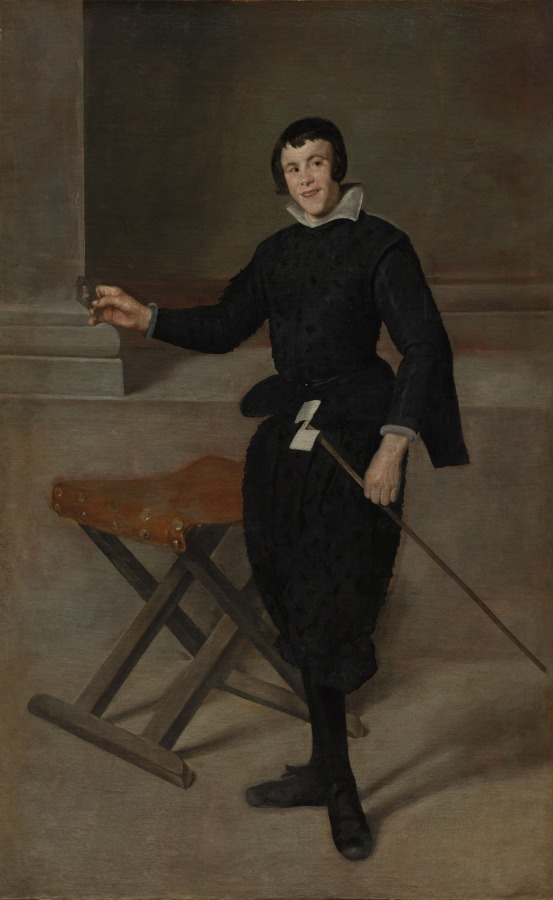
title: Portrait of the Jester Calabazas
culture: Spain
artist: Diego Velázquez (Spanish, 1599–1660)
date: c. 1631–32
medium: oil on canvas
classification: Painting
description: Calabazas, a jester in the court of King Philip IV of Spain, had physical and mental disabilities, a state that the artist emphasizes, rather than tries to hide. While the Spanish court prized and doted upon people with disabilities such as Calabazas, Velázquez transformed their depiction in portraiture. This startling work uses the format of the formal, full-length court portrait to present a type of person who was generally perceived as marginal at this point in history and profoundly humanizes him.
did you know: Calabazas holds a wind-driven pinwheel and a miniature portrait of a woman, together suggesting the inconstancy of love.